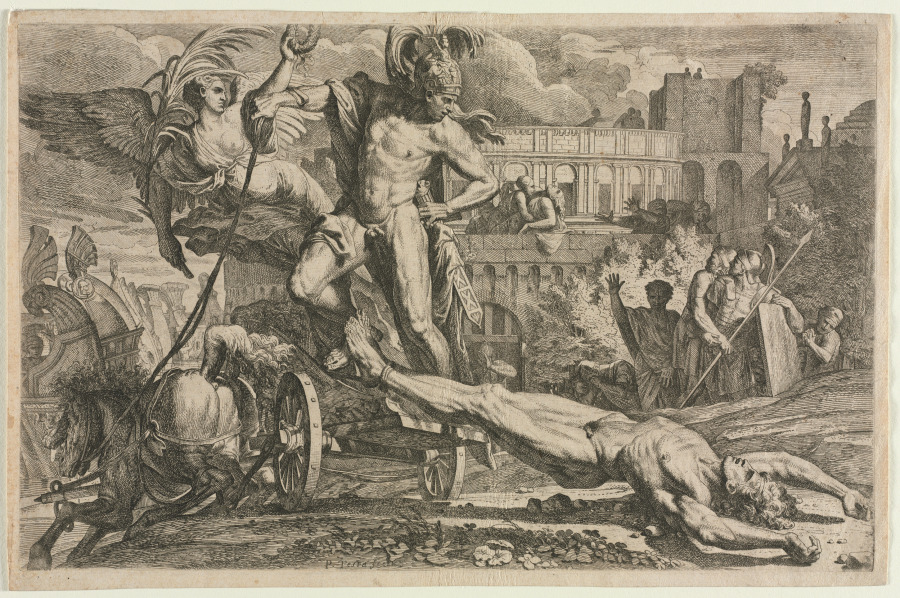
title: Achilles Dragging the Body of Hector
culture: Italy, 17th century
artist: Pietro Testa (Italian, 1612–1650)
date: 1648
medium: etching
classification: Print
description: The strong diagonals and heroic male bodies in this print relay an episode from the Trojan War in which the Greek warrior Achilles takes vengeance on the Trojan prince Hector for murdering his friend Patroclus. Here, Achilles is depicted dragging Hector’s dead body behind a chariot outside the gates of Troy. Primarily a draftsman and printmaker, Pietro Testa was known for the remarkable effects of space, texture, and light he was able to achieve by immersing the copper plate in an acid bath in several stages. This method allowed for deeper etched lines, in such areas as the dark shadows that frame the two central figures, while retaining sketchier details in the background.